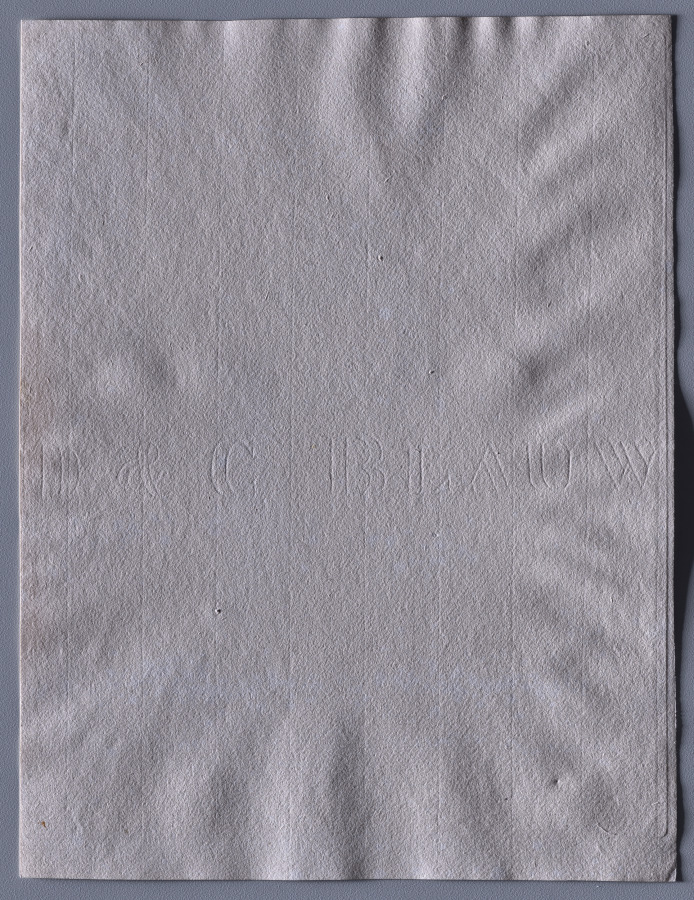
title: Wedding at the Louvre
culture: France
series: L'Assommoir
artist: Gaston de Latouche (French, 1854–1913)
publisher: Cadart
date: 1878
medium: drypoint on laid paper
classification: Print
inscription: Signed, in plate, at lower left: Gaston La Touche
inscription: inscribed, in plate, at lower right: 1878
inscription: inscribed, in blue pencil, at lower left: l’assommoir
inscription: in pencil, at lower left: La noce au Louvre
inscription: in pencil, at lower right: …Et des siècles d’art passaient devant / leur ignorance ahurie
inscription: Watermark: D.C. BLAUW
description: Although his work changed throughout his career, early on Gaston La Touche belonged loosely to the Impressionist circle through his association with Édouard Manet. La Touche explored subjects—such as that seen here—taken from the lives of working-class Parisians. This print represents a scene from naturalist author Émile Zola’s novel L’Assommoir, which detailed the rise and fall of a laundress named Gervaise. La Touche is said to have collaborated with the author on the imagery and exhibited the entire series at the public Paris Salon in 1879.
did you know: Gaston La Touche completely changed the subjects and style of his work around 1890 and destroyed much of his early work.